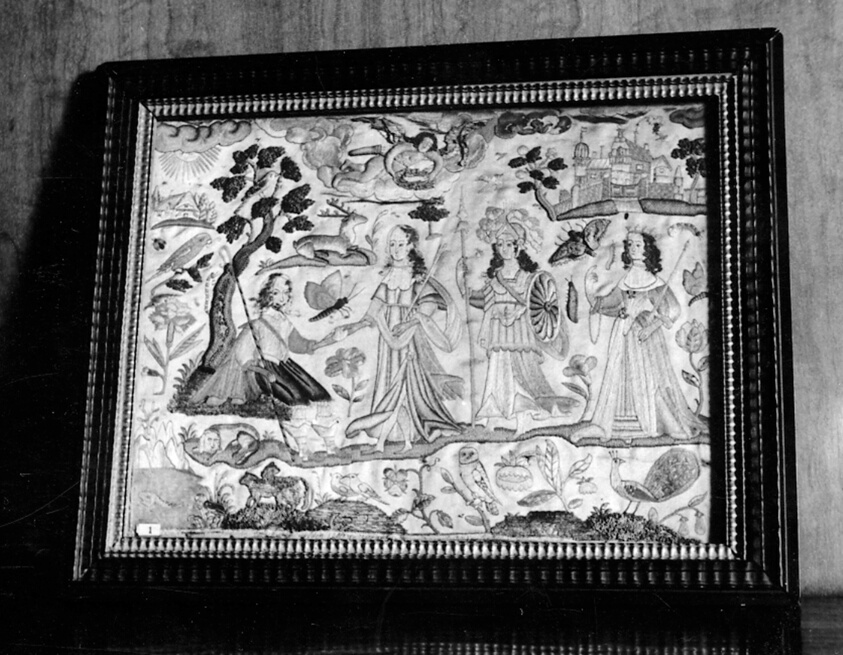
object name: Textile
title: Picture (Depicting the Judgement of Paris) (Needlework)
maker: England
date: 1625/75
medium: Silk and metal thread, satin weave; embroidered in knot, lace, loop, satin, and tent stiches, areas of raised work and cut darned velvet pile; wooden frame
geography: England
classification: textile; needlework (visual works)